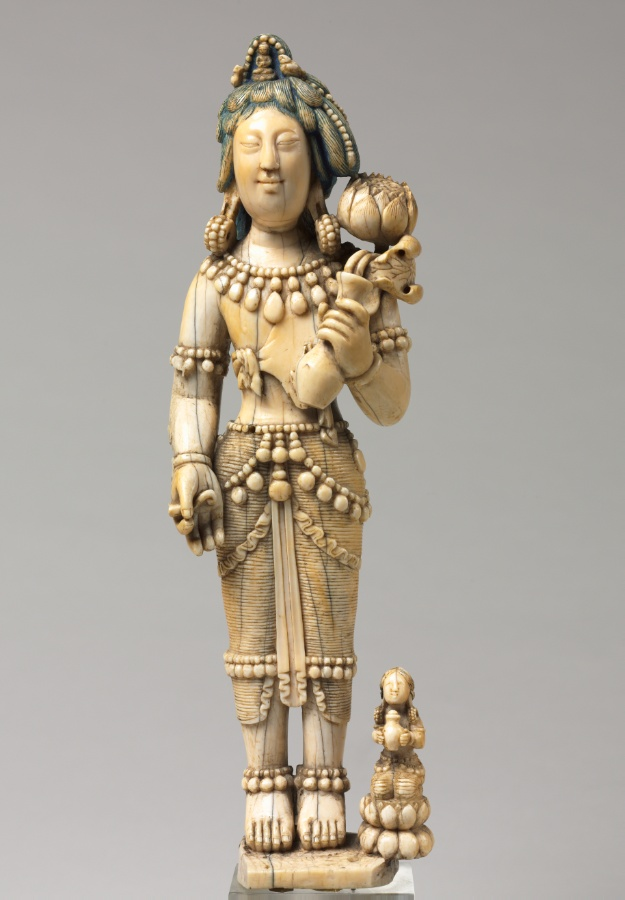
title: Bodhisattva of Compassion (Avalokiteshvara)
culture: Tibet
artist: Choying Dorje, the Tenth Black Hat Karmapa (Tibetan, 1604–1674)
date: 1647–48 or 1658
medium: ivory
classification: Ivory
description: Choying Dorje was one of the most influential monastic leaders in the history of Tibetan Buddhism. Known as the Tenth Karmapa, he was the head of the Karma Kagyu order of monks. His biographies state that from a young age he had a talent and passion for carving and painting images of bodhisattvas and other enlightened beings. Several of his original works survive, including this exceptionally rare ivory carving of Avalokiteshvara holding a lotus. Stylistically it is related to images from southwestern China, where he stayed in exile from 1647 to 1648 in the wake of Mongol invasions that destroyed many Kagyu monasteries in Tibet. While there he was exposed to Chinese art, which was favored by his patrons. The face has the distinctive elongation unique to Dorje's personal style. This sculpture could have been made during his time of exile or a decade later after his return to Tibet.